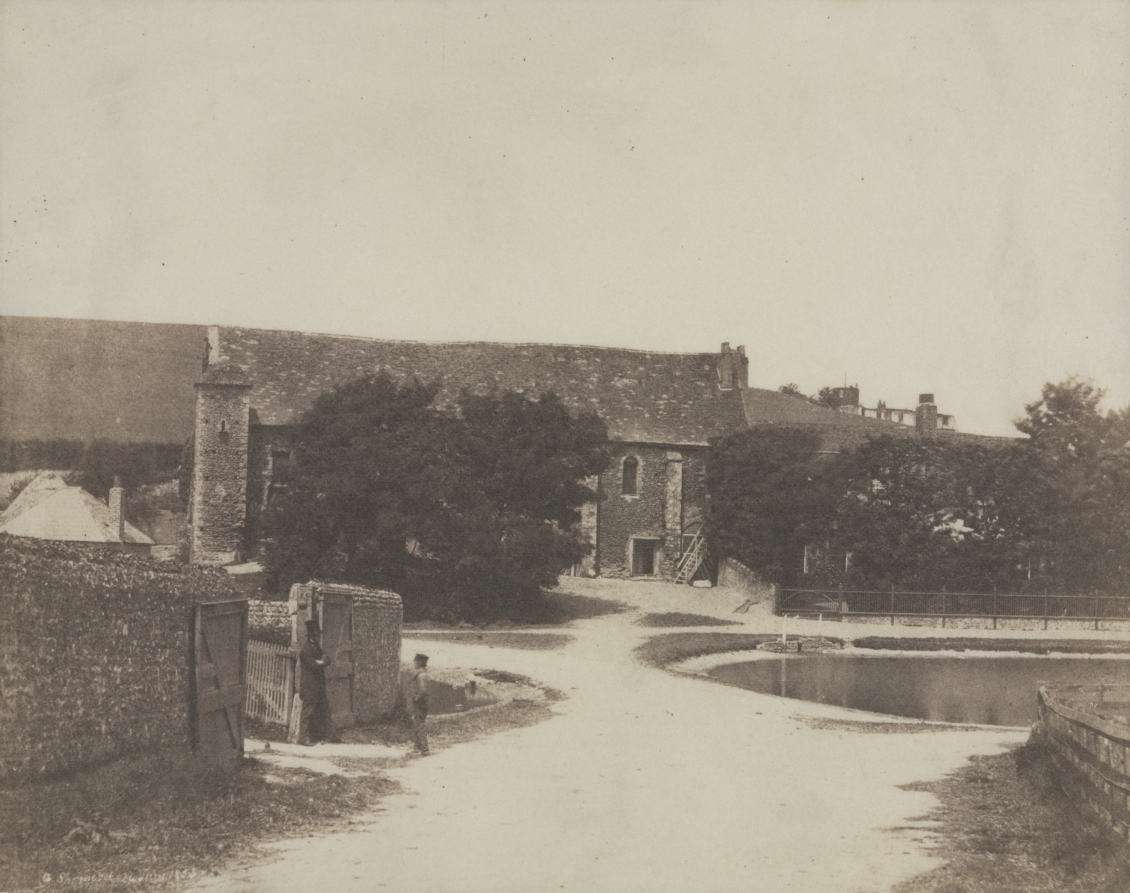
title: A Priory, Lyminge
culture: England, 19th century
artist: George B. Shepherd (British)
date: 1853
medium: salted paper print from calotype negative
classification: Photograph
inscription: Written in negative: "G. Shepherd Lyminge 1853"; in pencil on recto: "H"; in ink: "216"; in pencil on verso: "Mowll [?] No. 50 Priory"